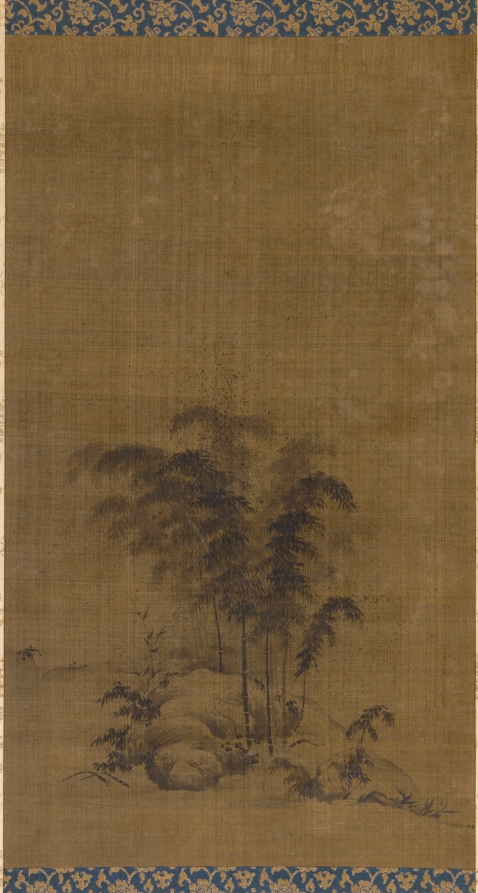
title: Bamboo Landscape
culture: China, Southern Song dynasty (1127–1279)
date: 1127–1279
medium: hanging scroll; ink on silk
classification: Painting